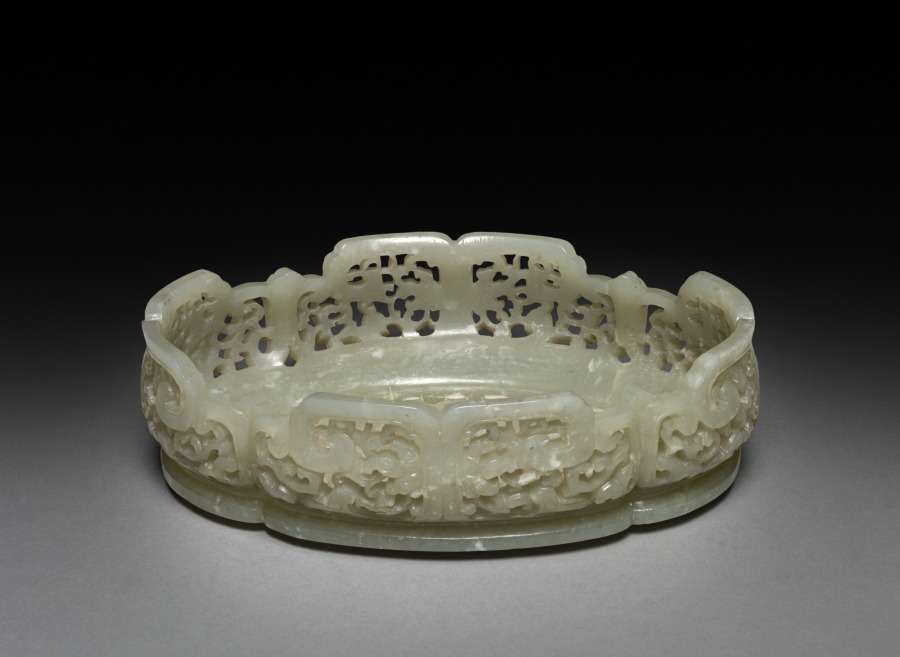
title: Oval Stand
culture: China, Qing dynasty (1644–1911), Qianlong reign (1736–95)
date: 1700s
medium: jade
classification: Jade